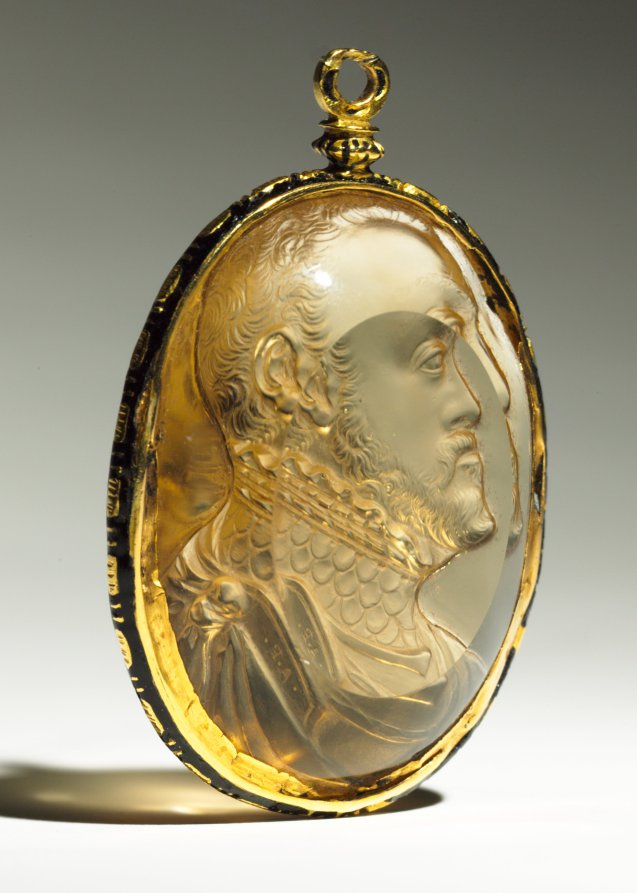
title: Portrait of Philip II, King of Spain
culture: Italy, 16th century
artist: Alessandro Cesati (Italian, before 1538-after 1564)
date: mid-1550s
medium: citrine, mounted in a gold and enamel pendant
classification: Sculpture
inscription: Signed on collar .A.E. (Likely abbreviation for “ΑΛΕΞΑΝΔΡΟΣ ΕΠΟΙΕΙ”, or “Alexandros Epoiei,” which translates to “Alexander made [me / this].”)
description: Clad in armor, Philip II wears a chain with the Order of Golden Fleece around his neck. The remarkably precise and varied cutting describes the textures of cloth, metal, skin, and hair while presenting the king’s features with striking naturalism—complete with receding hairline and prominent chin—as well as conveying his forceful character. Carved gems were luxury arts of the highest order in the Renaissance, hotly collected and used as diplomatic gifts. The original patron is not yet known, but cameos played a prominent role at the Spanish court, where the royal family often hold gems of Philip II in their portraits. The yellow quartz, rare in the 1500s, probably came from a newly opened source in South America; this object is thus both a natural marvel and a masterful portrait. One of only three known works signed by the artist (his initials appear at miniscule scale on the collar just below the knot of cloth), this stone is also likely in its original setting.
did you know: The ancient Romans believed citrine, a type of quartz, offered protection against evil thoughts.